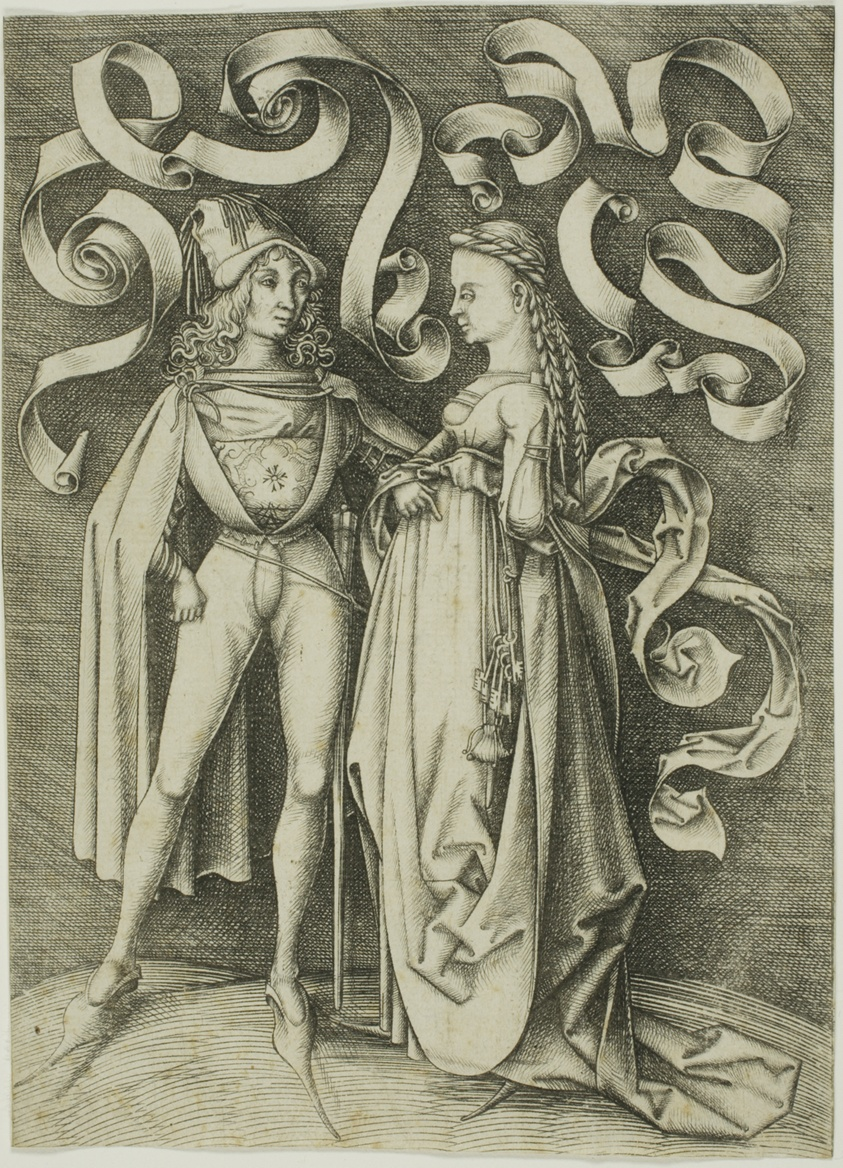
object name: Print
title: The Knight and the Lady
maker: Israhel van Meckenem the Younger; German, c. 1440/45-1503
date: c. 1495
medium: Engraving printed in black on cream laid paper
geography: Germany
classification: engraving; print; prints and drawing